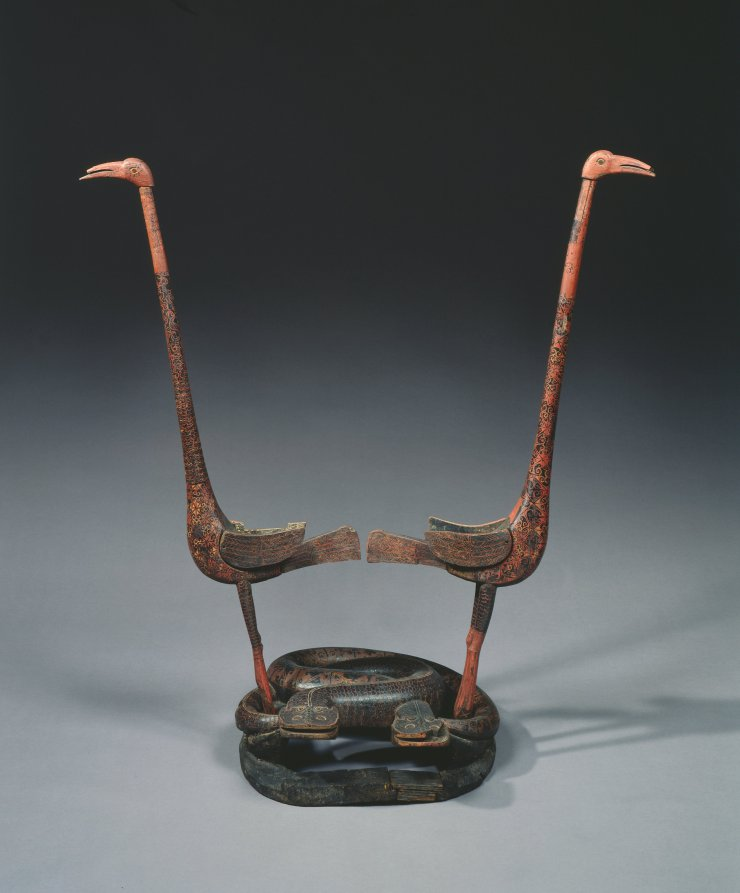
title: Cranes and Serpents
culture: China, reportedly from Hunan province, Changsha, Warring States period (475–221 BCE), State of Chu (c. 1046–223 BCE)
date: 475–221 BCE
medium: lacquered wood with polychromy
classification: Sculpture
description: A different style of ritual art developed in the state of Chu in South China. In addition to bronze vessels, lacquered wood artifacts expanded the repertory of ritual implements. This extraordinary sculpture was probably a drum stand for supporting a suspended drum in ritual ceremonies. It is unique among other excavated drum stands of the Chu, which typically show two birds standing on tigers. The theme of the bird stepping on the serpent was common in the Chu visual culture. Yet the slender proportions and seemingly flimsy structure of this particular set raise the question of whether it was utilitarian or mostly served symbolic functions in the tomb. The birds' and serpents' bodies have designs painted in red lacquer and yellow pigment against the black lacquer. Scientific analyses confirm the additional use of a blue or green pigment that has been discolored over time.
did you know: The cranes' long necks allowed a lightweight drum to be suspended from strings through the beaks, while the densely intertwined snakes provided a weighty base to stabilize the object during musical performances.